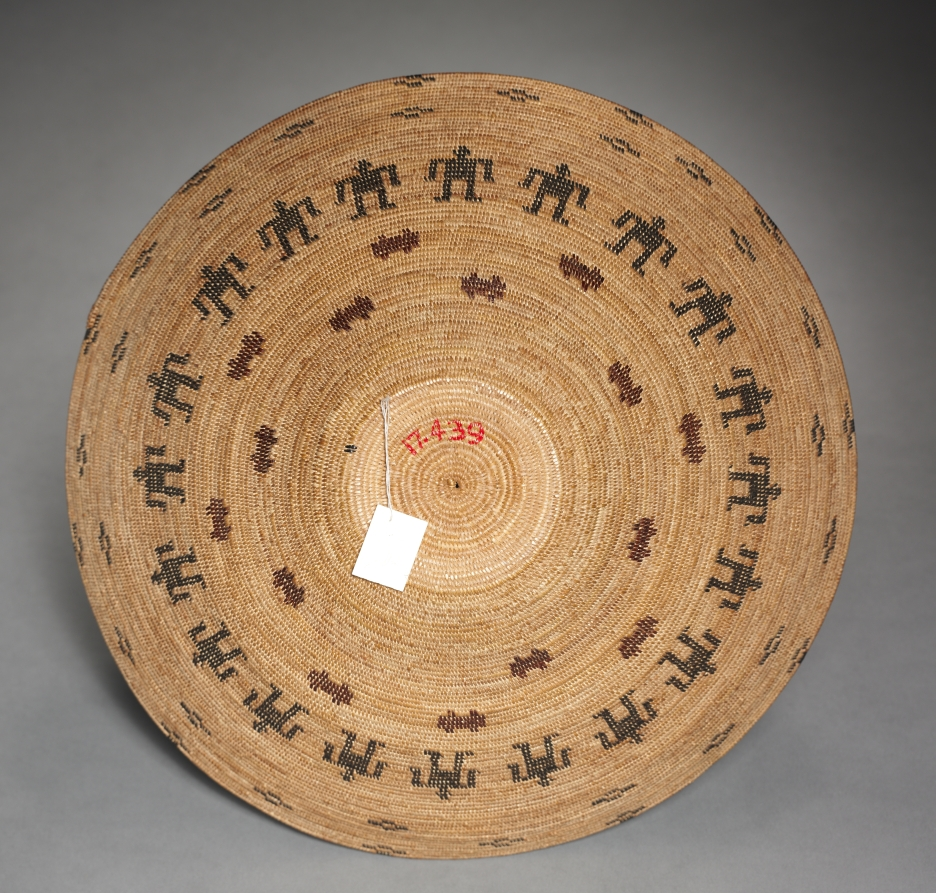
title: Bowl Basket (Unfinished)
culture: California, Yokuts, late 19th- early 20th century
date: 1895–1900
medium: Redbud, sedge, bracken fern; coiled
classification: Basketry